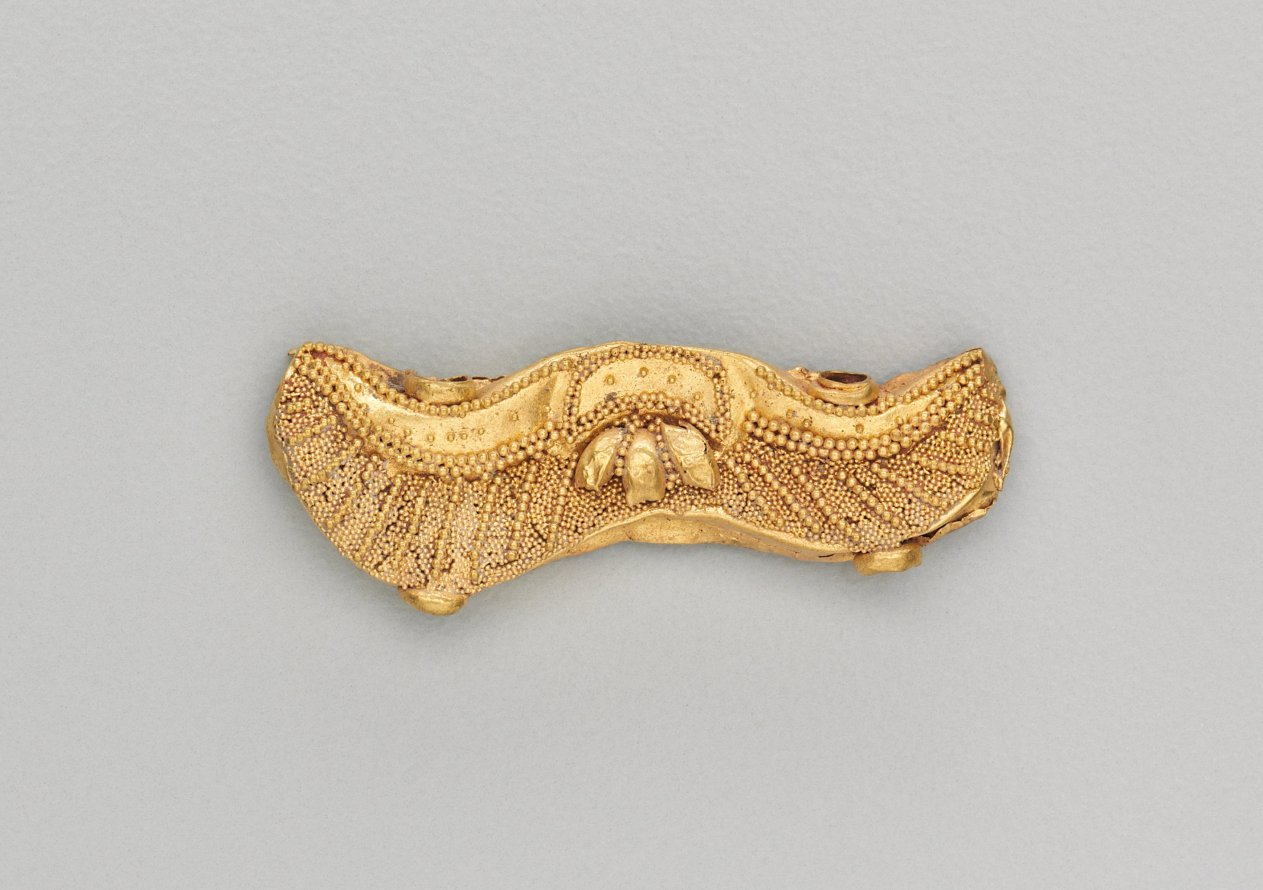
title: Set of Pendants Ending in a Bull's Head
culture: India, Shunga period (185–78 BCE)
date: 185–72 BCE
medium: gold repoussé with granulation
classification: Jewelry